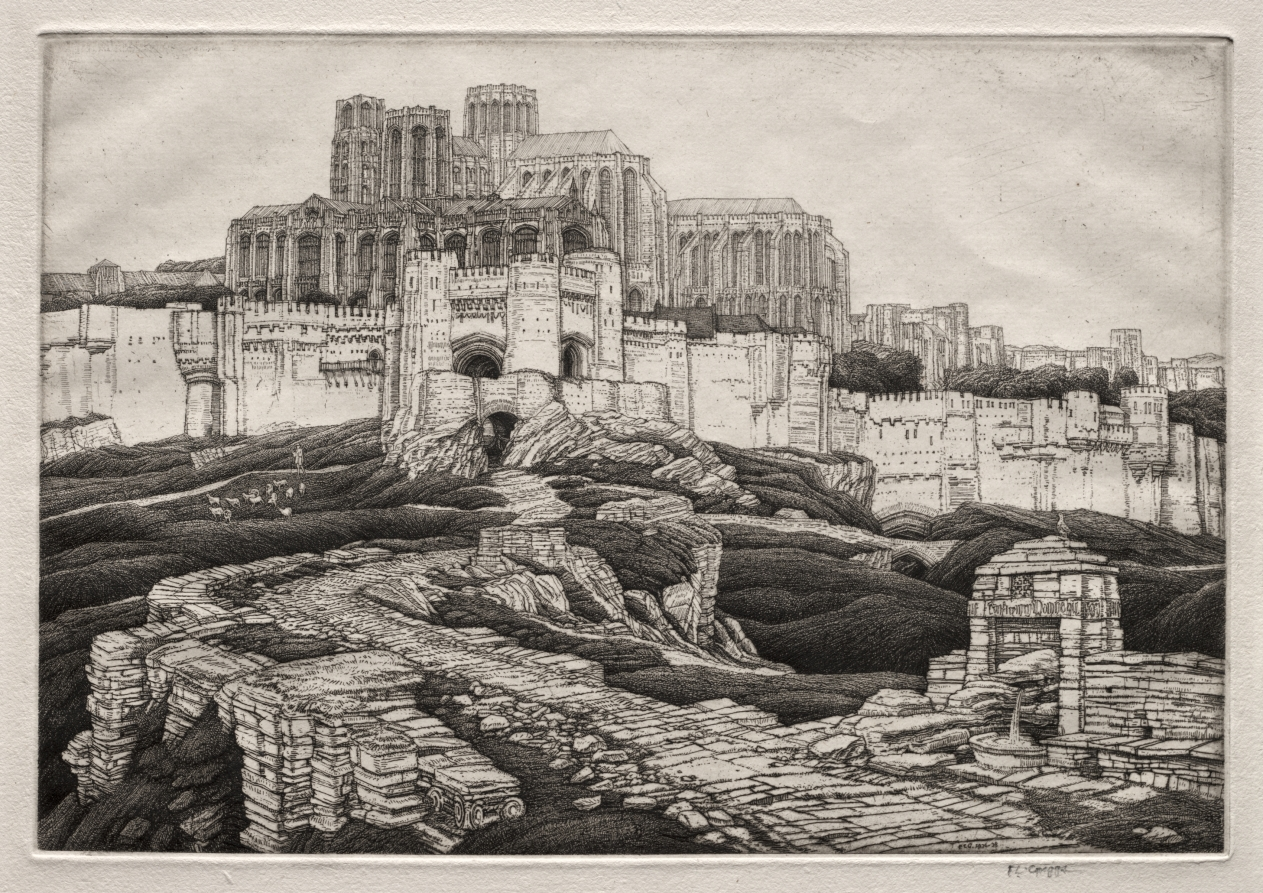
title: Sarras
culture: England, 20th century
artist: Frederick Landseer Maur Griggs (British, 1876–1938)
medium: etching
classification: Print